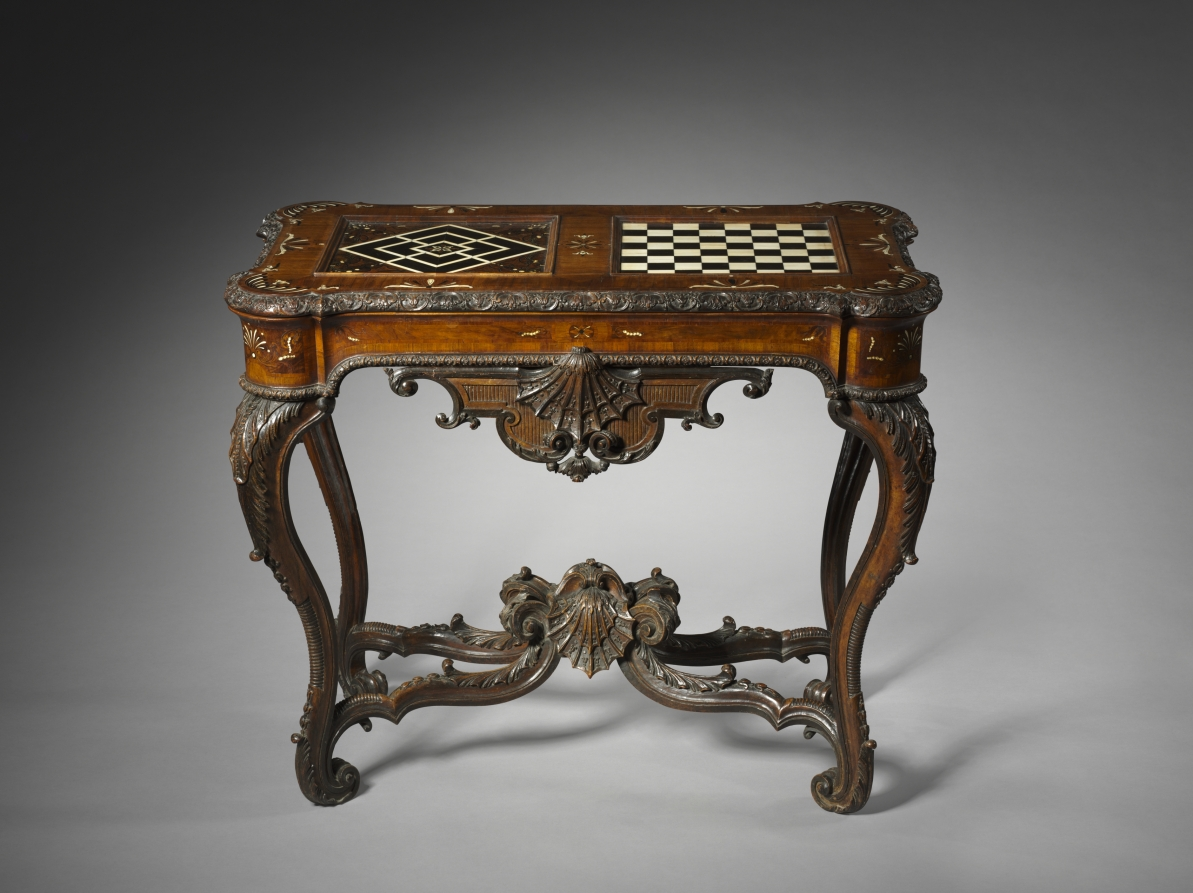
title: Gaming Table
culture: Germany, Mainz, 18th century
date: c. 1735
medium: wood and ivory marquetry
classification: Furniture and woodwork